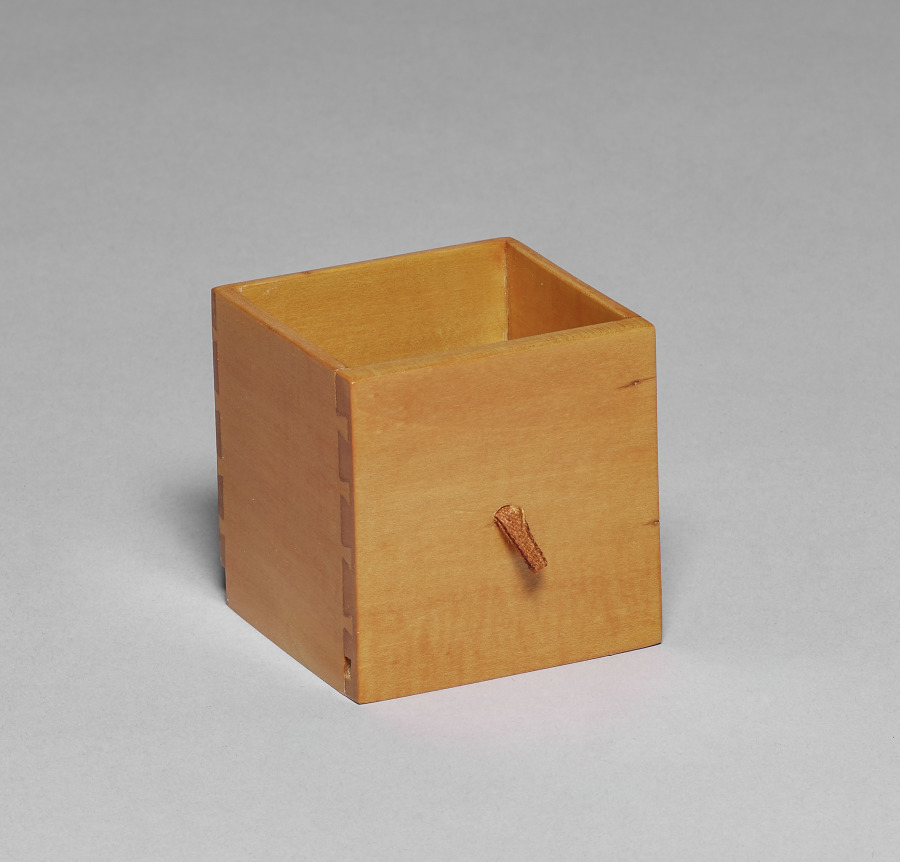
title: Concealed Drawer for a Globe Work Table (Globustisch)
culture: Austria, Vienna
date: c. 1810–15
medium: Burl walnut veneer, mahogany, ebony, satinwood, gilt wood, painted wood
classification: Furniture and woodwork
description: Work tables resembling globes were the usual form for a lady's sewing or writing table around 1800 in Austria. Combining moving parts, secret compartments, and highly finished decoration, these tables were also a way for the cabinetmaker to show off his skill. The tripod supports and temple-like architectural quality of both the exterior and interior decoration reflect the fashionable taste for neoclassical style, or Biedermeier as it was called in Austria, where Vienna was the center of such elaborate furniture production.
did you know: The top half of the globe rotates upward to reveal hidden compartments for sewing tools, threads, and unfinished fabric pieces.